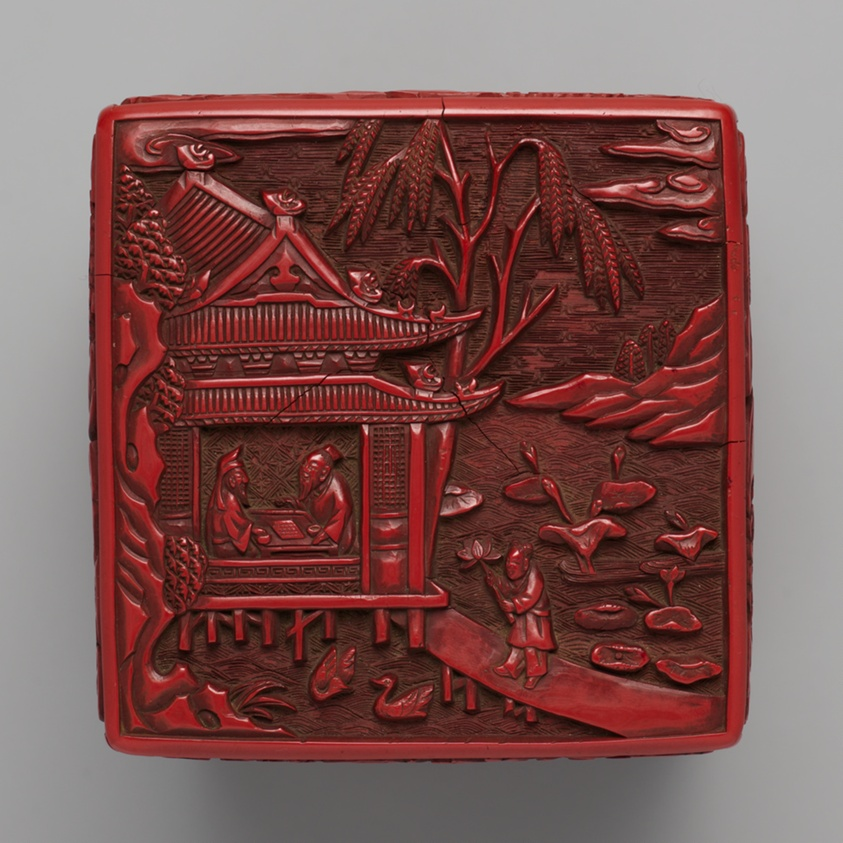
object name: Decorative Arts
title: Four-Tiered Square Box and Cover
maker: China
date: Ming dynasty (1368-1644), 16th century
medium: Carved cinnabar lacquer and black lacquer (interior)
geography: China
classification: lacquer